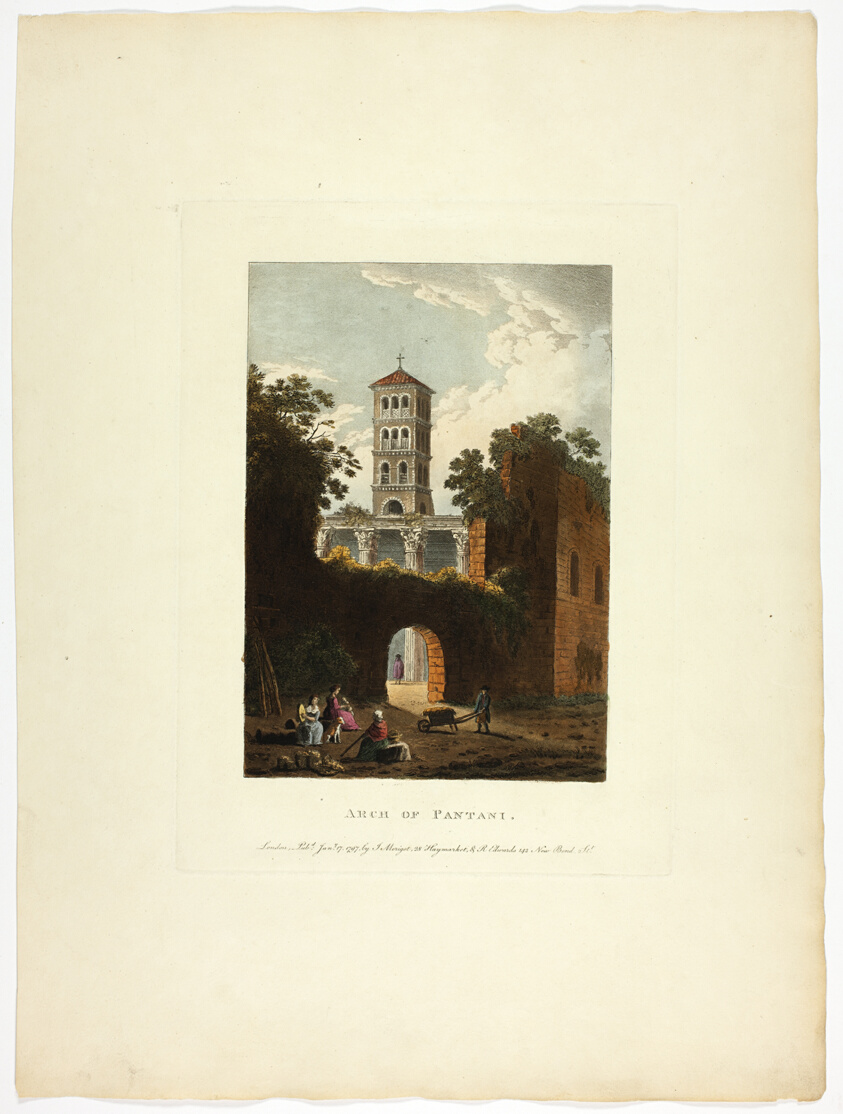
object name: Print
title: Arch of Pantani, plate thirty-seven from the Ruins of Rome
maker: M. Dubourg, (English, active 1786-1838); published by J. Merigot (Italian, Unknown)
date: published January 17, 1797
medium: Hand-colored aquatint on paper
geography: England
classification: aquatint; print; prints and drawing